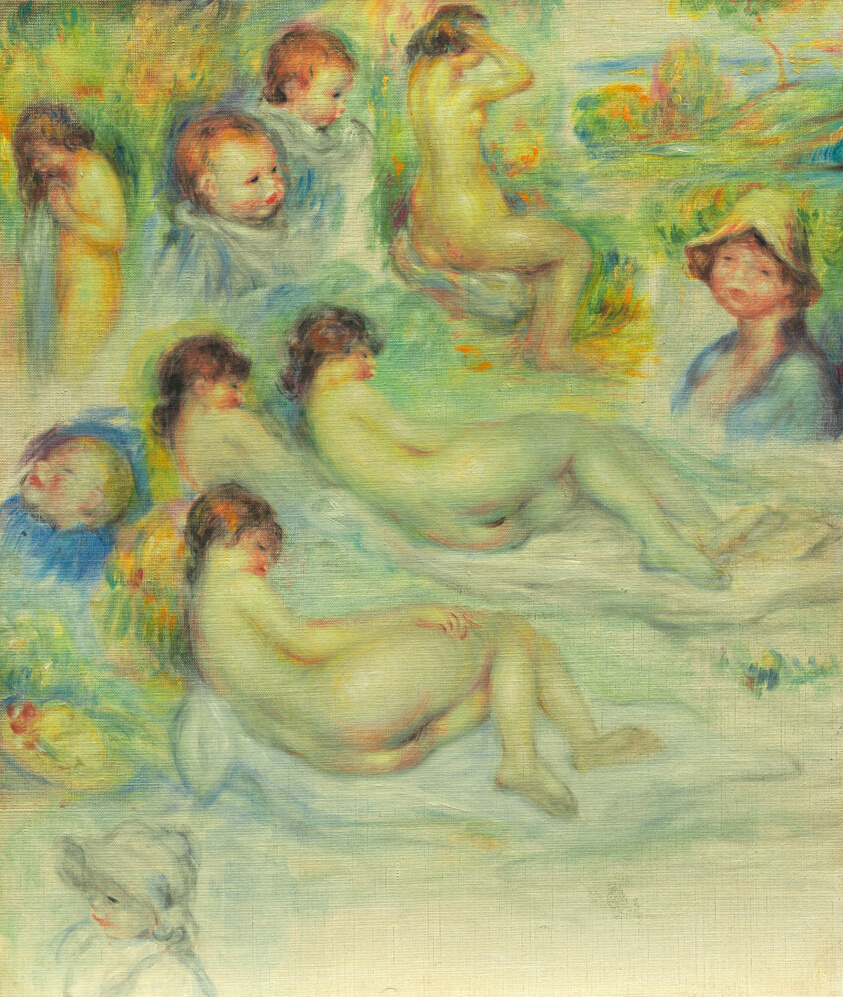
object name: Painting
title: Studies of Pierre Renoir; His Mother, Aline Charigot; Nudes; and Landscape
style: Impressionism, nineteenth century, 19th century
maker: Pierre-Auguste Renoir (French, 1841–1919)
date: 1885–86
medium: Oil on canvas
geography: France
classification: painting; studies; sketch; paint; oil paintings (visual works); oil on canvas; french; european painting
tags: studies, study, sketch, nudes, mother, babies, children, bathers, water, landscape, woman, green (color), trees, flowers, women